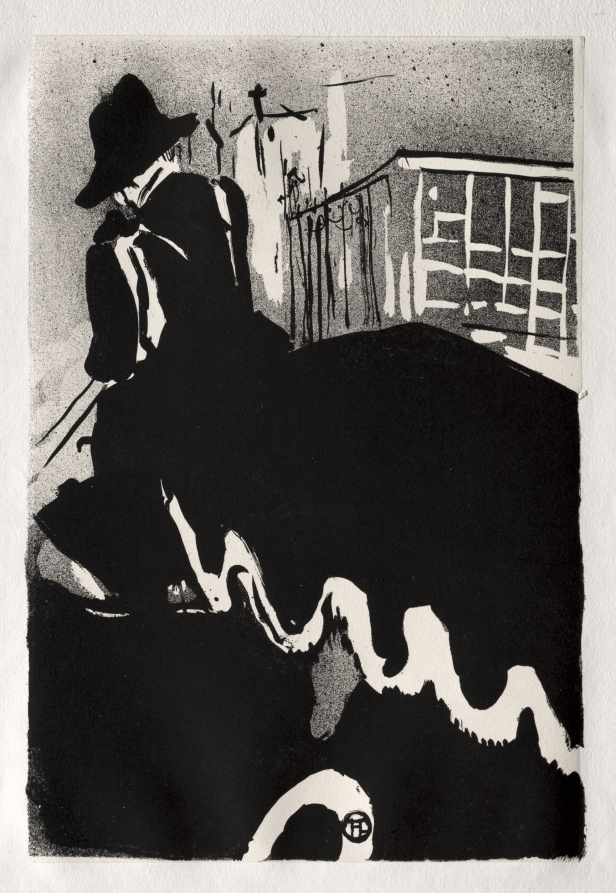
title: Ultime Ballade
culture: France, 19th century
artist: Henri de Toulouse-Lautrec (French, 1864–1901)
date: 1893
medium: lithograph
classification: Print